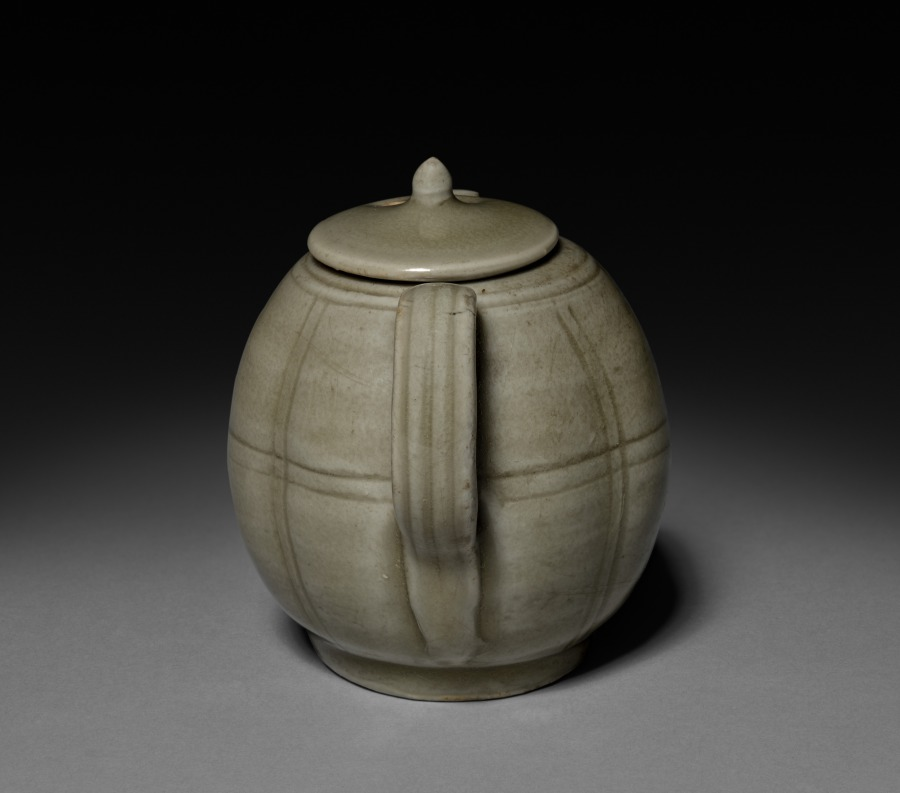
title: Wine Pot: Southern Celadon Ware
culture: China, Southern Song Dynasty (1127-1279) - Yuan Dynasty (1271-1368)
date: 1200s-1300s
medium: glazed porcelain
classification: Ceramic